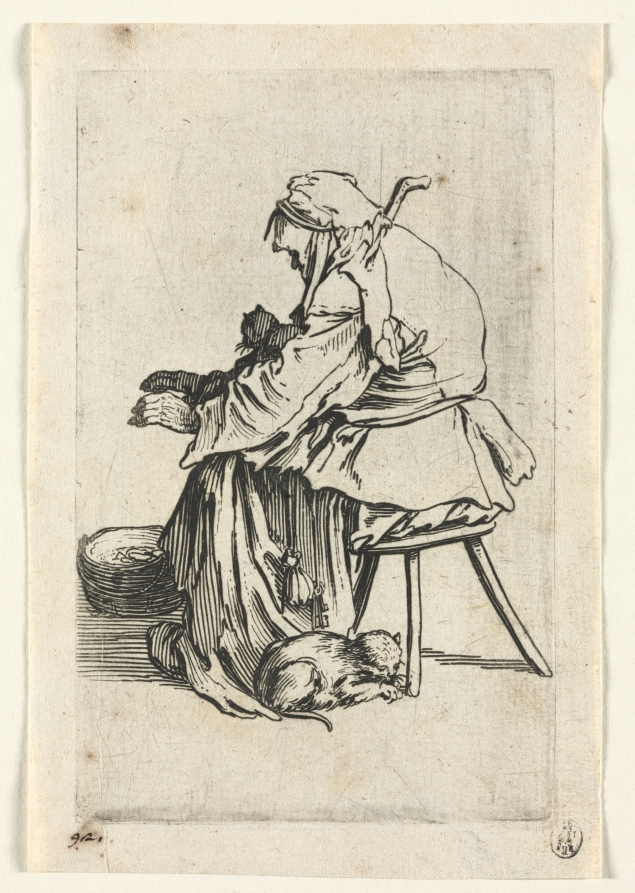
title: The Beggars: Old Woman and Cats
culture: France, 17th century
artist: Jacques Callot (French, 1592–1635)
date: c. 1623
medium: etching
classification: Print